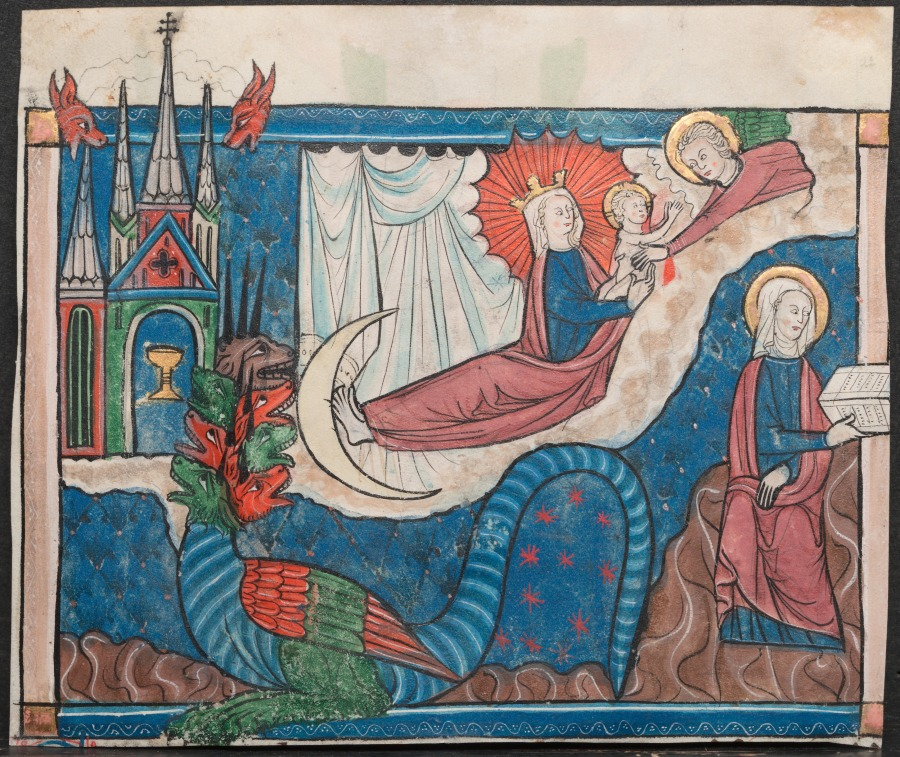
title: Miniature from a Manuscript of the Apocalypse: The Woman Clothed with the Sun and The War in Heaven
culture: France, Lorraine, 13th century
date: c. 1295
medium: ink, tempera, and gold on vellum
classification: Manuscript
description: The visionary text of St. John the Evangelist's Apocalypse, the final book of the New Testament, inspired these images of salvation, sin, and divine retribution. A large number of illustrated volumes of the Apocalypse appeared in Northern Europe, especially in England, after the year 1240--perhaps reflecting a fear of the world's end. These miniatures come from a manuscript produced in Lorraine, then artistically influenced by English models.